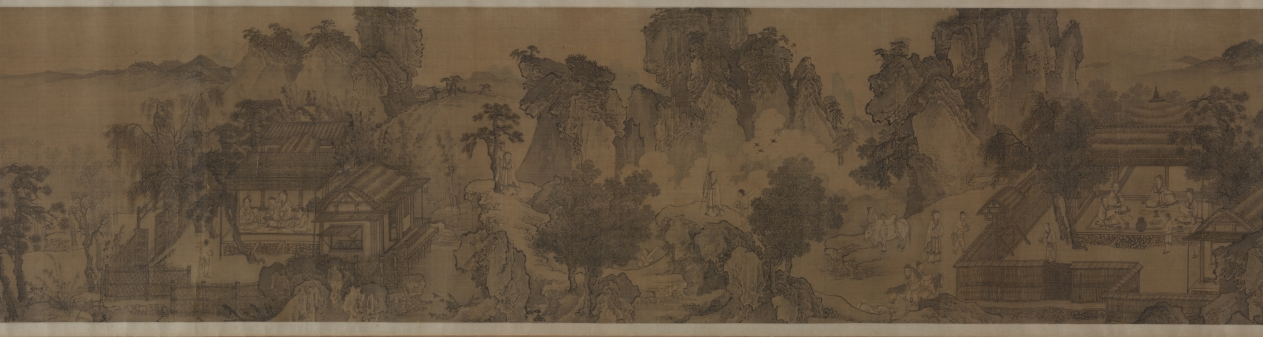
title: Tao Yuanming's Return Home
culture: China, Yuan dynasty (1271-1368)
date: 1300s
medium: Handscroll; ink and slight color on silk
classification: Painting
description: Tao Yuanming's revered poem "Return Home 歸去來辭 (Gui qu lai ci)" powerfully conveys his desire to leave bureaucratic life for the simplicity and authenticity of nature. This sentiment has deeply resonated with generations of Chinese scholars, making it a popular theme in paintings. This handscroll uses continuous narrative depicting Tao in multiple scenes from the poem. Starting on the right, the poet travels to his home. His children wait by the gate, while his wife pauses to tidy her hair before welcoming him. Then, free from the burdens of official service, Tao spends time in both nature and his cottage, where he can again enjoy wine, music, and books.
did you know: Poet Tao Yuanming 陶淵明 (c. 365–427 CE) returned to a secluded life instead of pursuing a civil service career.